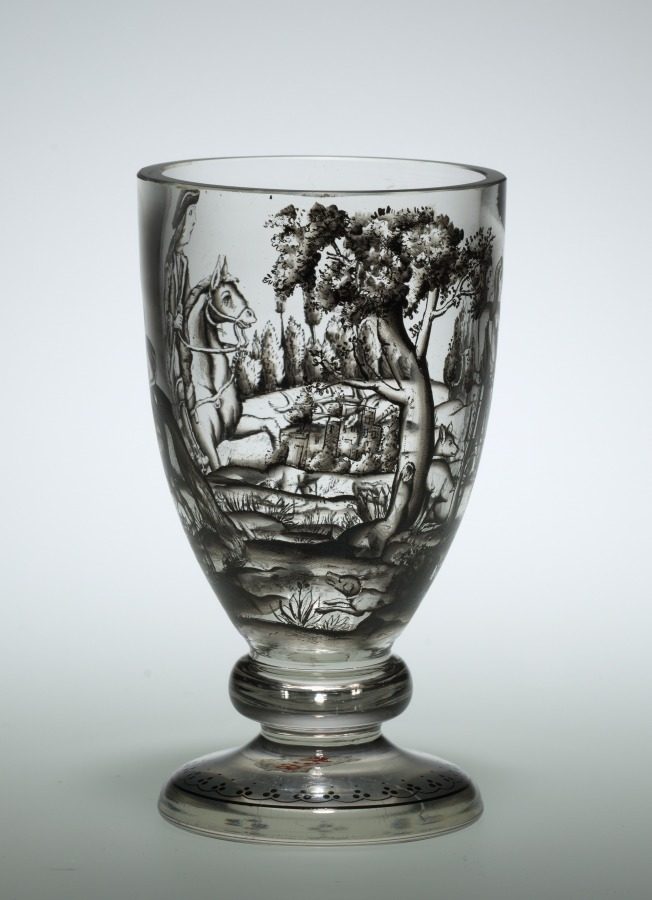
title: Glass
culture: Germany, 18th century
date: c. 1730–1750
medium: glass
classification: Glass